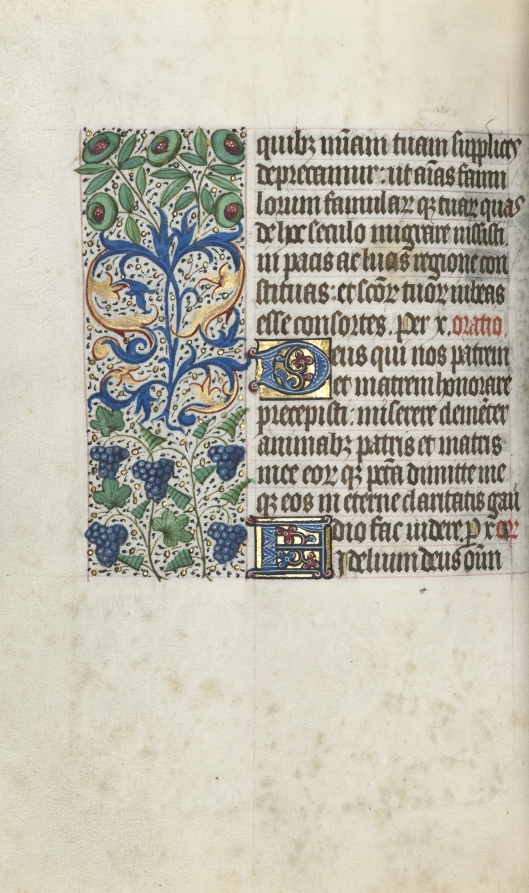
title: Book of Hours (Use of Rouen): fol. 109v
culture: France, Rouen, 15th century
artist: Master of the Geneva Latini (French, active Rouen, 1460–80)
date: c. 1470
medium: ink, tempera, and gold on vellum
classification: Bound Volume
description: In the late 1400s and early 1500s Rouen was an established and important center of book production. The city’s cathedral had a wealthy chapter that spent large sums of money to commission books and to maintain its extensive library. The stationers and booksellers would have likely been concentrated in or near the cathedral precinct. This artist, named after a manuscript now in Geneva, was Rouen’s principal illuminator during the second half of the 1400s.